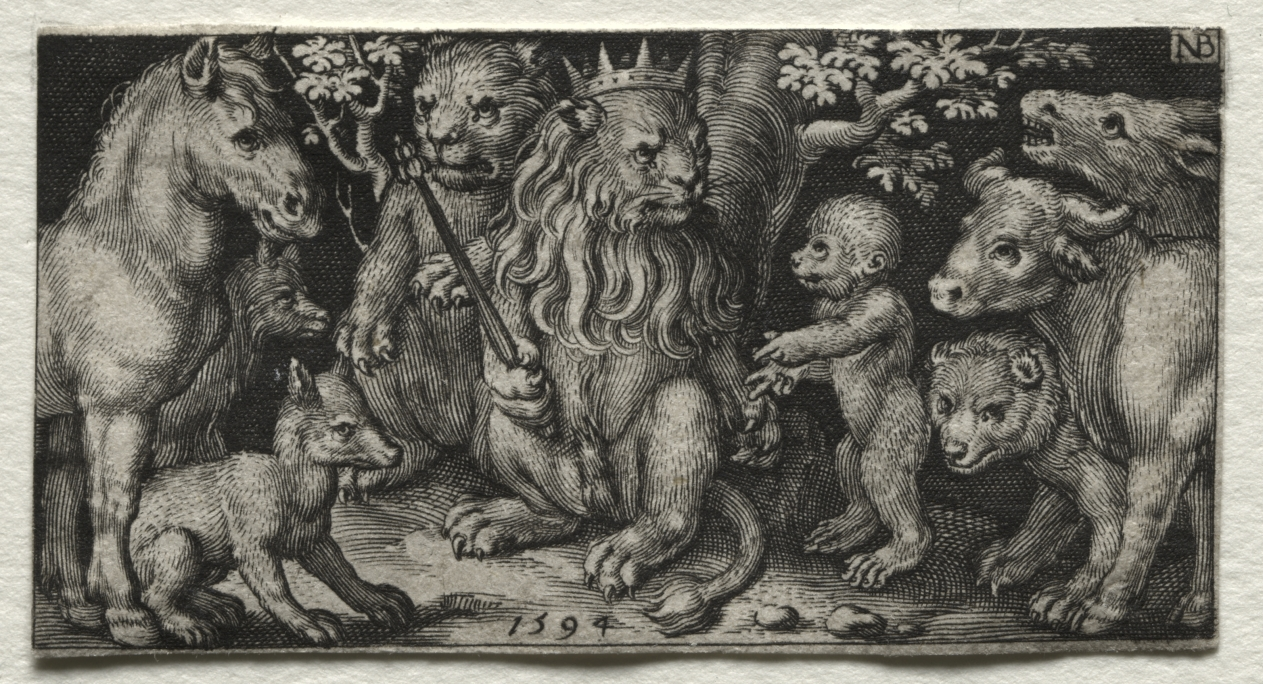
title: The King of Beasts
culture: Netherlands, 16th century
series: Fighting Chimeras and Scenes to Aesop's Fables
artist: Nicolaes de Bruyn (Netherlandish, 1571–1656)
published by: A. van Londerseel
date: 1594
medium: engraving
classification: Print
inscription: upper right, in plate: NB[in monogram] ; lower center, in plate: 1594 ; VERSO, lower left, in graphite: B 4241 ; lower center, in graphite: 9[circled] FPO ; lower right, in graphite: 6264/150